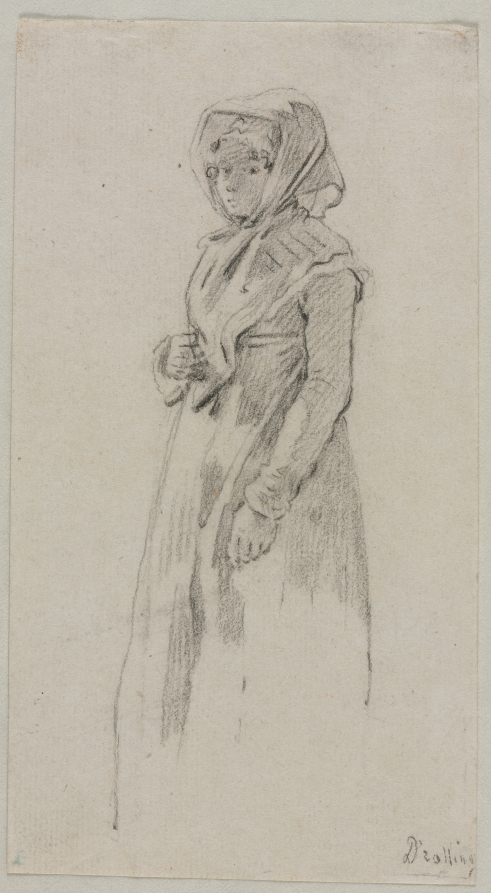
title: Figure of a Woman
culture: France, 19th century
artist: Michel-Martin Drölling (French, 1786–1851)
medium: pencil on paper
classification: Drawing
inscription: Signed in pencil, lower right: Drolling